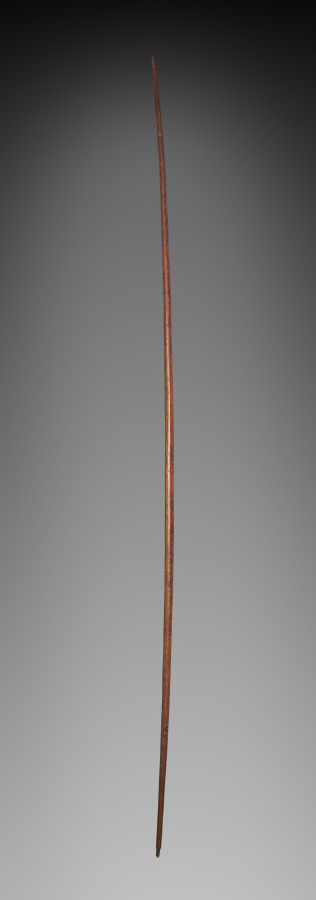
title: Bow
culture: Philippines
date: before 1922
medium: wood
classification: Arms and Armor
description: This long, slender bow is carved from a single piece of dark hardwood. It has a smooth, undecorated surface and a gentle natural curvature. Shallow grooves are cut into each end to secure a bowstring.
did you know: The Aeta (or Agta) people are the Indigenous population of the Philippines who follow a hunting and gathering lifestyle.